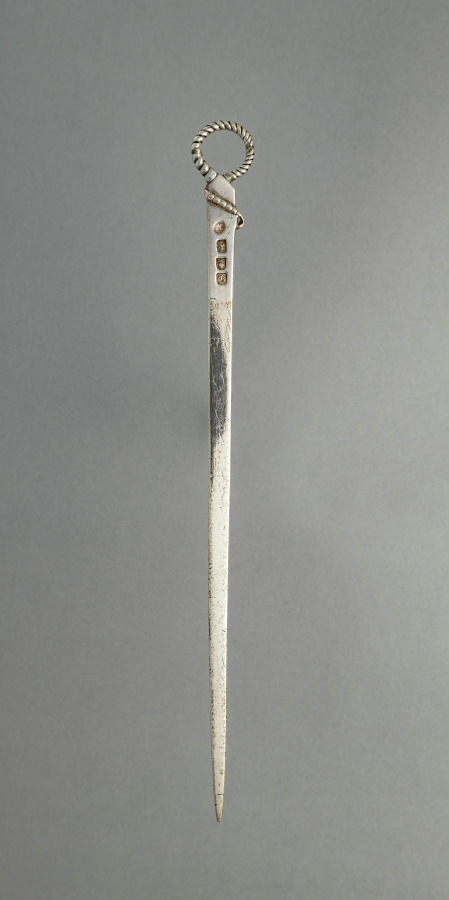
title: Skewer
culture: England, London, 18th century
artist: firm of Charles Wright (British)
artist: firm of Thomas Whipham (British)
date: 1762–1763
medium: silver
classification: Silver